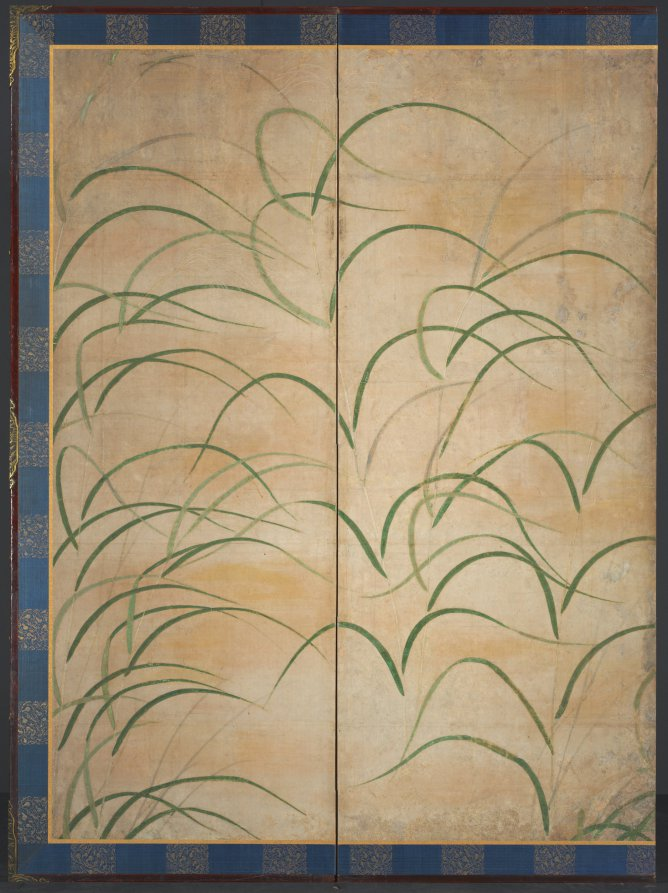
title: Susuki Grass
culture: Japan, Muromachi period (1392–1573)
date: c. 1525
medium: One of a pair of six-panel folding screens; ink, color, and gold on paper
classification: Painting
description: Susuki grass has a seasonal association with autumn in the Japanese visual and literary tradition. It is one of the “Seven Flowers of Autumn,” along with bush clover, arrowroot, pink, patrinia, mistflower, and bellflower. This composition immerses the beholder in a field of grasses and golden bands of mist. The design may have served as a backdrop for poems brushed in ink on decorated papers and attached to the surface of the screens, a practice with a long tradition in Japan.